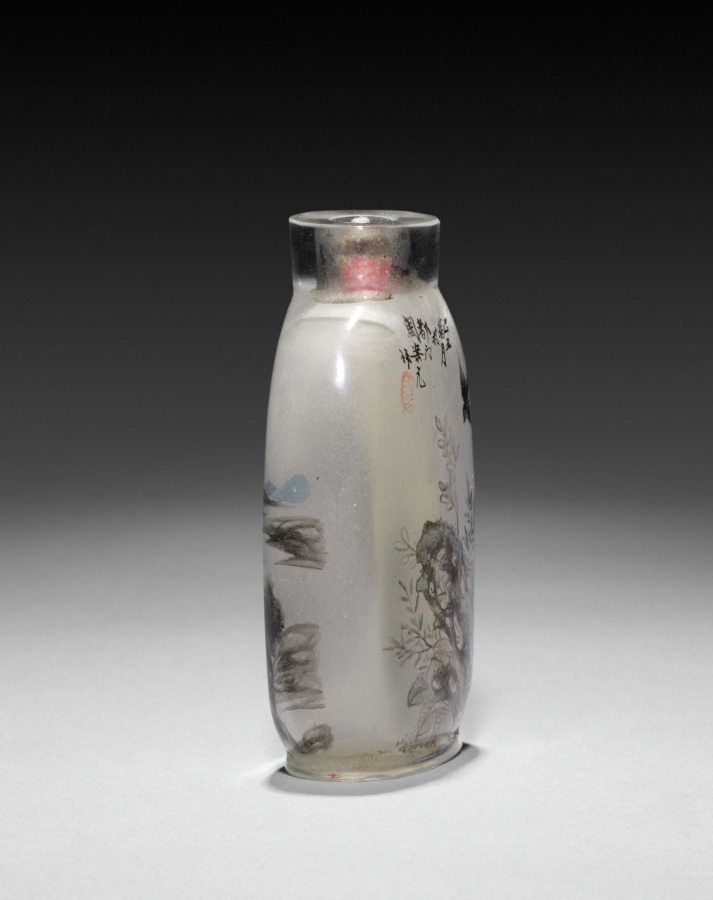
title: Snuff Bottle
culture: China, Qing dynasty (1644-1911)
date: 1644–1911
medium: glass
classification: Glass